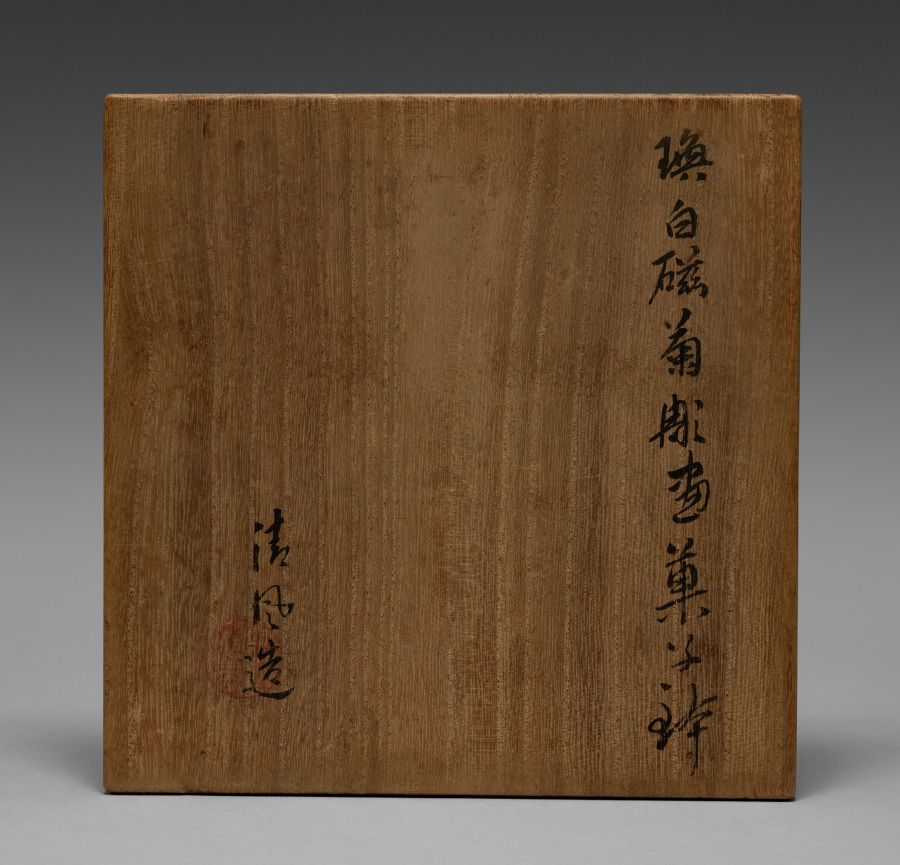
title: Sweets Bowl with Chrysanthemums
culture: Japan, Taishō period (1912–26) or Shōwa period (1926–89)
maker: Seifū Yohei IV (Japanese, 1872–1951)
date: 1914–46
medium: Porcelain with in-glaze and underglaze color and molded design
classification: Ceramic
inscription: 清風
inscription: 成山清風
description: Sweets bowls hold the confections enjoyed when drinking tea. This bowl and CMA 2022.207 offer an important lesson in appreciating Yohei IV’s ceramic practice, for while they have the same design and shape and are made with the same materials, the execution of the pieces makes them entirely different upon close inspection, thereby demonstrating the range of possible production results from a single template. Each bowl has the same composition of two different types of chrysanthemum flowers, one with long, slim, knifelike petals and the other with short, rounded, multilayered petals, shown running around its surface in low relief. The centers of the flowers are painted with yellow under the glaze. Yohei III formulated a number of new underglaze colors during his career, and this is likely one of them. The storage box lid provides abbreviated descriptions of the complex processes used in the surface decorations. It identifies the bowl inside as “Sweets dish with picture of chrysanthemum in kanpakuyū.” The box lid has on its exterior the seal reading “Seizan Seifu” 成山清風, which includes Yohei IV’s style name, but no signature. Instead, a signature is found on the interior of the box lid, accompanied by another seal, this time a gourd-shaped seal reading “Seifu.” The ink inscriptions are in a mode closer to formal script. This bowl, with the signature on the inside of the box lid, stands out for a distinctively bubble-filled glaze with a heavier pink effect, as well as more noticeable yellow at the flowers’ centers and deeper carving in the relief decoration. The design has crept much closer to the rim. A closer look at the delineation of the flower petals reveals that the designs differ at times with respect to which petals appear in front or behind others. The centers of the bases of both bowls are incised with “Seifu” in a manner matching many other works by Yohei IV, although there are slight differences. As one might expect from the other differences in the bowls, the characters on the base of the subtle bowl, CMA 2022.207, are gentler, finishing in a tapering out of the strokes. The strokes on this bold bowl end in triangular pinheads.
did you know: Here Yohei IV used his father’s kanpakuji formula, with underglaze pink for the gradated wash of color surrounding the flowers.